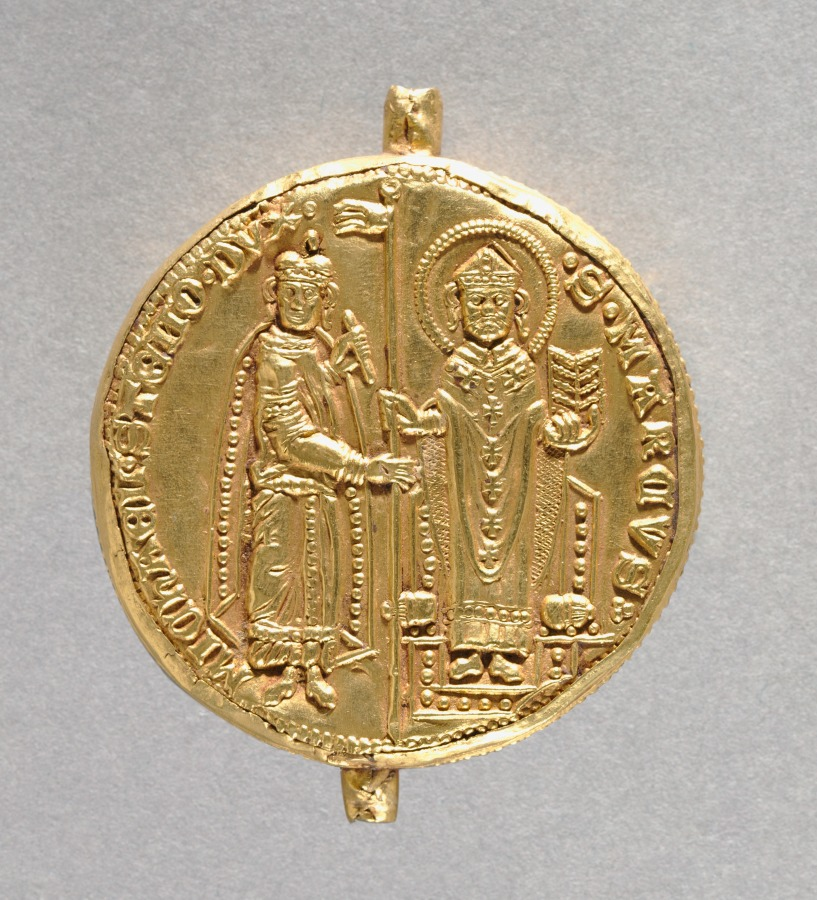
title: Seal of Doge Michele Steno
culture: Italy, Venice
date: 1400–1409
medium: repoussé gold over a core of wax and resin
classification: Metalwork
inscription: the figures of the Doge and St. Mark are identified by the inscription.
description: This opulent seal, an example of the splendor surrounding the ruler of Venice, was once attached to a charter issued in 1409. Seals were molded or embossed and attached to official documents as evidence of authenticity. This example is thought to be one of the finest Venetian seals to be preserved.